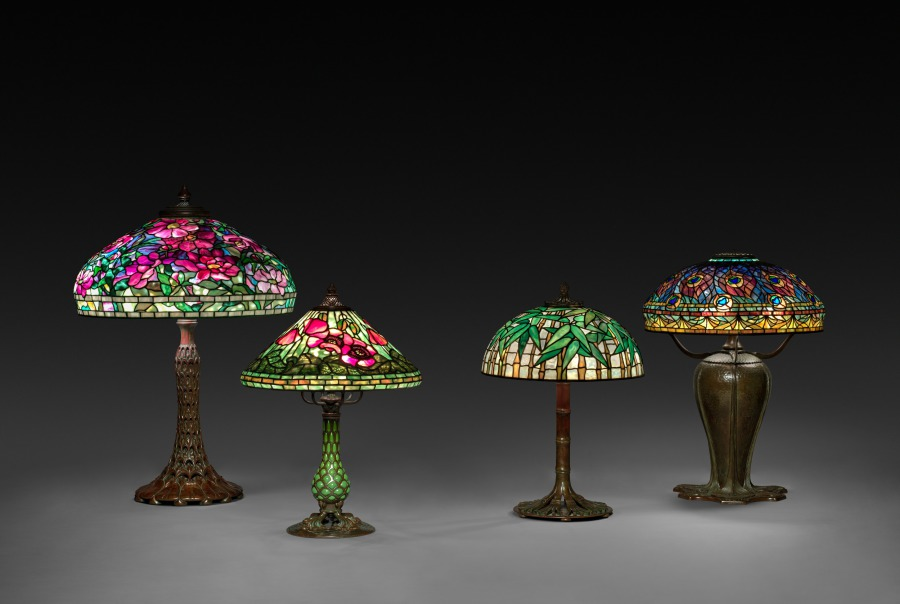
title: Peony Table Lamp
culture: America, New York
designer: probably by Clara Wolcott Driscoll (American, 1861–1944)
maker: Tiffany Studios (United States, New York, 1902–32)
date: c. 1902–10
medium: Leaded glass, bronze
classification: Lamp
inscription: Shade impressed: TIFFANY STUDIOS NEW YORK 355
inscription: Base impressed: TIFFANY STUDIOS/NEW YORK/542/ 2574 [scratched]